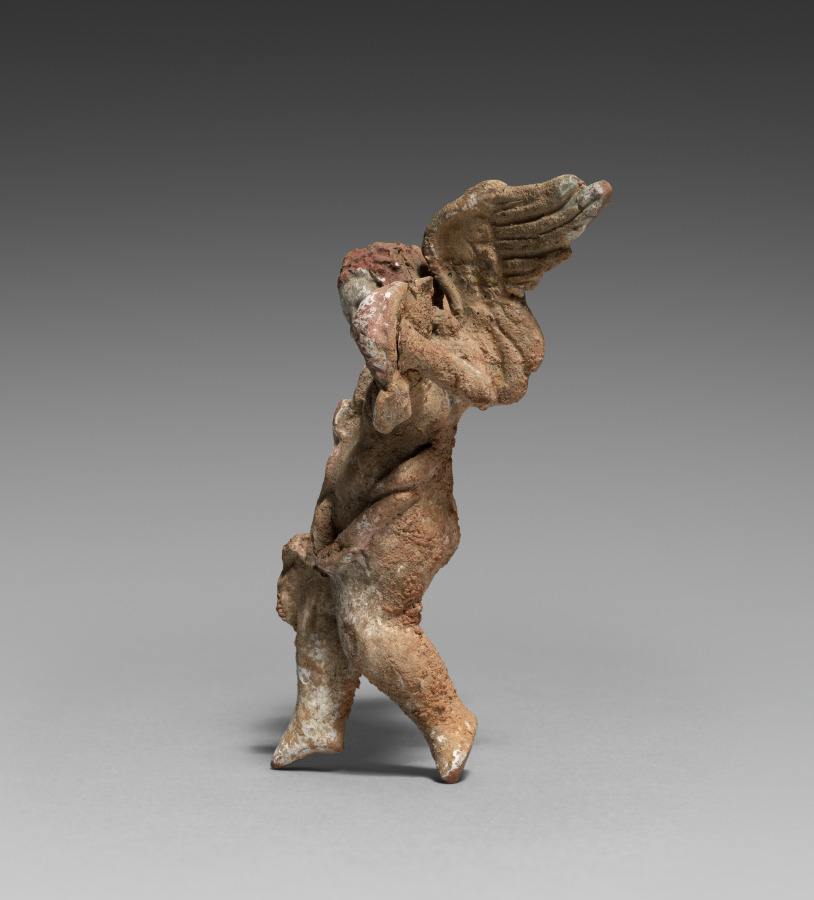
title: Figurine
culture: Greece, Myrina, Hellenistic period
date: 300–100 BCE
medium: terracotta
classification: Sculpture